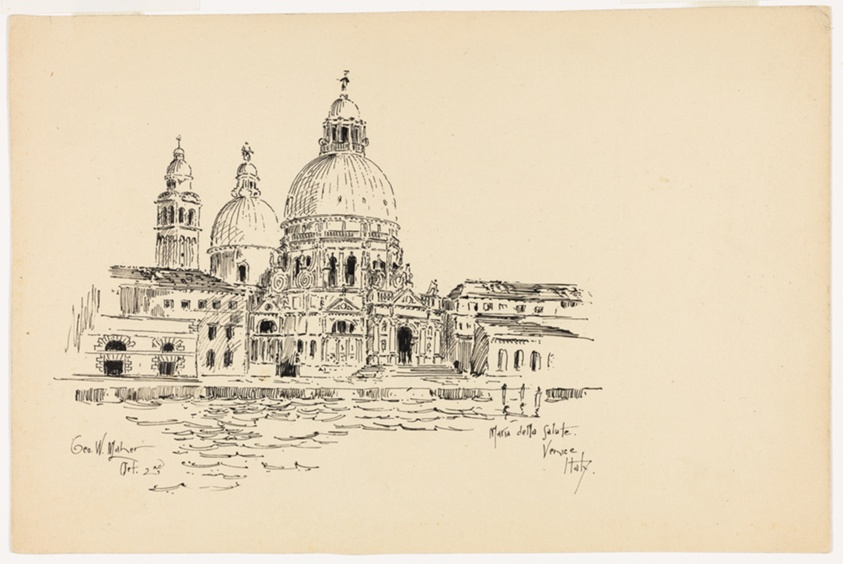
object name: Architectural Drawing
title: Sta. Maria della Salute, Venice, Italy, Travel Sketch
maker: George Washington Maher (American, 1864–1926)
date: 1891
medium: Ink on heavy paper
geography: United States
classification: pen and ink drawings; drawings (visual works); architecture; architectural drawing